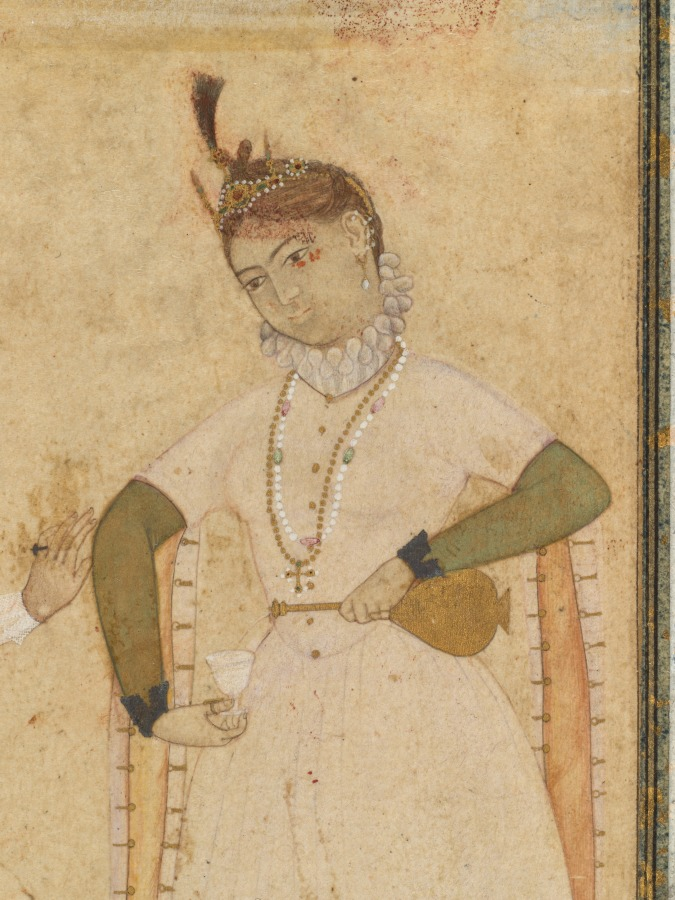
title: A European Couple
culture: India, Bijapur, Deccan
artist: attributed to Ali Riza, the "Bodleian Painter" (Indian)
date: c. 1610–27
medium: Gum tempera and gold on paper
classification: Painting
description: This painting of a European couple seems to be based on close observation and a desire to record the appearance of foreigners. The artist has accurately depicted the 17th-century European clothing in great detail, particularly in the collar ruffs, linen cuffs, and ornate jewelry worn by both figures.